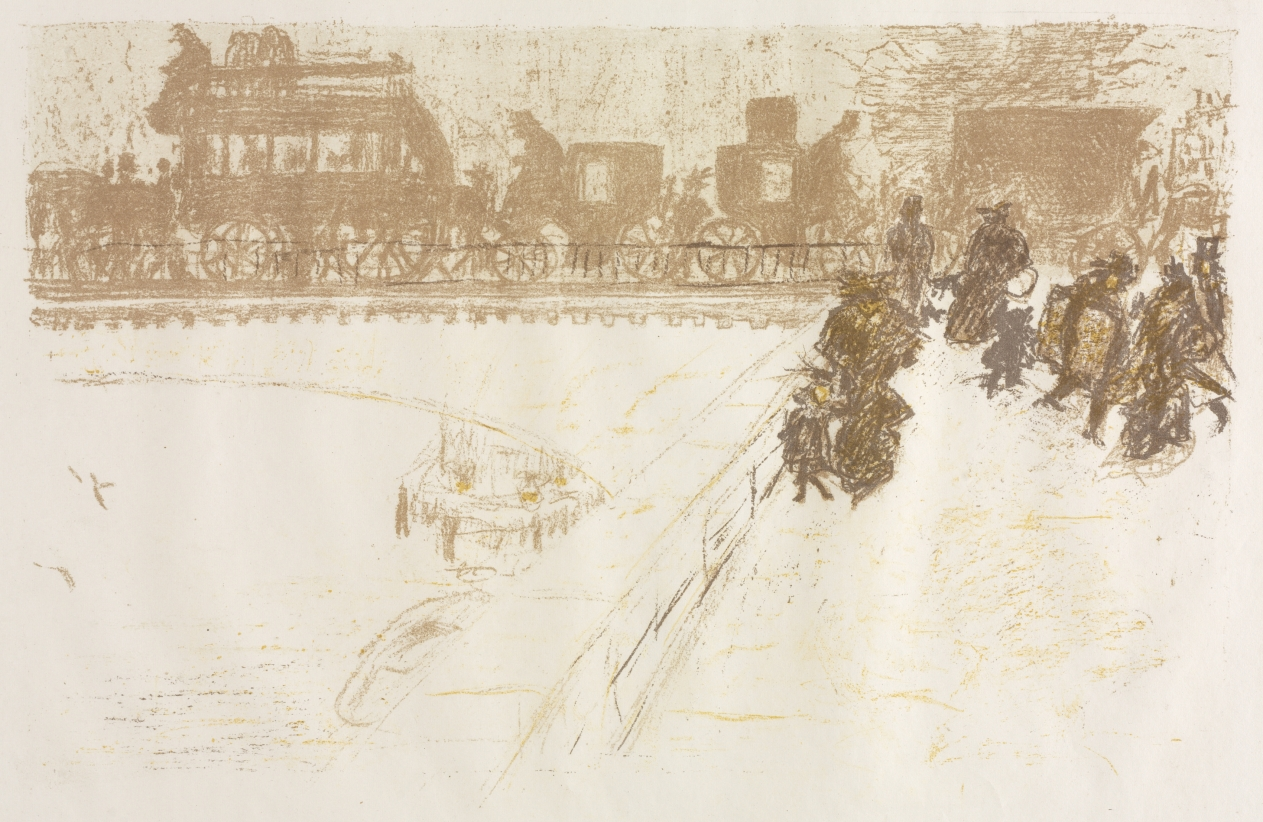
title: Bridge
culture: France, 19th century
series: Some Scenes of Parisian Life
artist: Pierre Bonnard (French, 1867–1947)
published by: Published by Ambroise Vollard; Printed by Auguste Clot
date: 1899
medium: lithograph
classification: Print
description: This suite of color lithographs collected Pierre Bonnard’s observations of city life, ranging from animated street scenes to distant observations glimpsed from the artist’s Montmartre studio window. Rather than memorializing the famous monuments of Paris, Bonnard preferred to depict small neighborhood scenes populated by urbanites shopping and strolling and by vendors selling their wares. The setting for one of the prints is the second-largest public park in Paris, the Bois de Boulogne, which was a popular place for families to relax, stroll, and enjoy carriage rides around the lakes. Two prints are nocturnal scenes in which gaslight emanating from shop windows is reflected on the wet streets, creating passages of bright yellow in the otherwise dark compositions. Bonnard’s favorite subjects, such as the Parisienne—a young, fashionable, modern woman—as well as children and dogs, appear repeatedly throughout the prints in the suite.